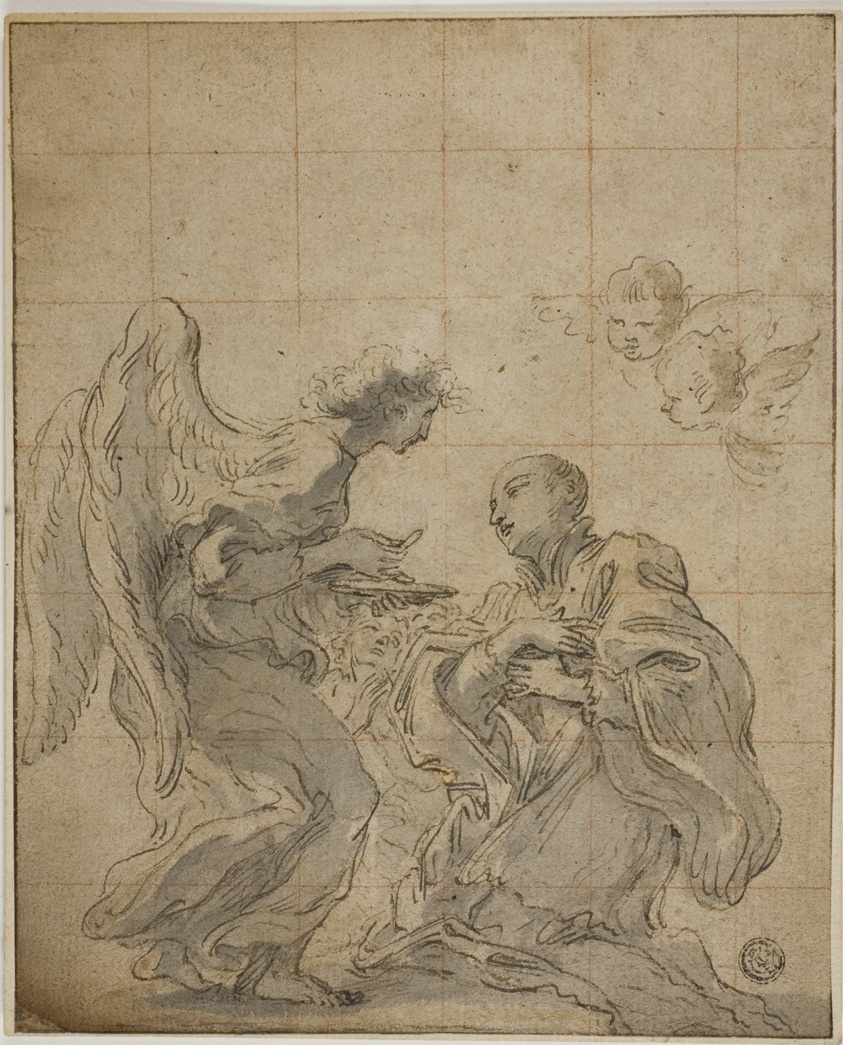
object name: Drawing and Watercolor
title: Communion of Saint Stanislaus Kostka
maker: Circle of Gian Lorenzo Bernini (Italian, 1598-1680); or possibly after Giovanni Battista Gaulli (Italian, 1639-1709); or attributed to Giovanni Paolo Schor (Austrian, 1615-1674)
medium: Pen and black and brown ink, with brush and gray wash, squared in red chalk, on tan laid paper, laid down on cream laid paper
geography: Italy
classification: pen and ink drawings; drawings (visual works); prints and drawing